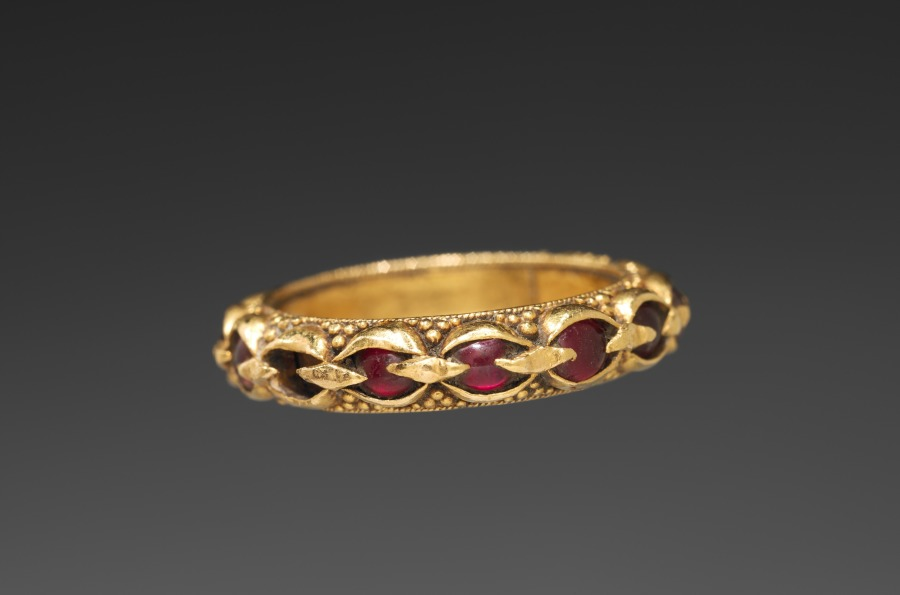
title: Ring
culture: Cambodia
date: 1800s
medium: gold with rubies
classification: Jewelry